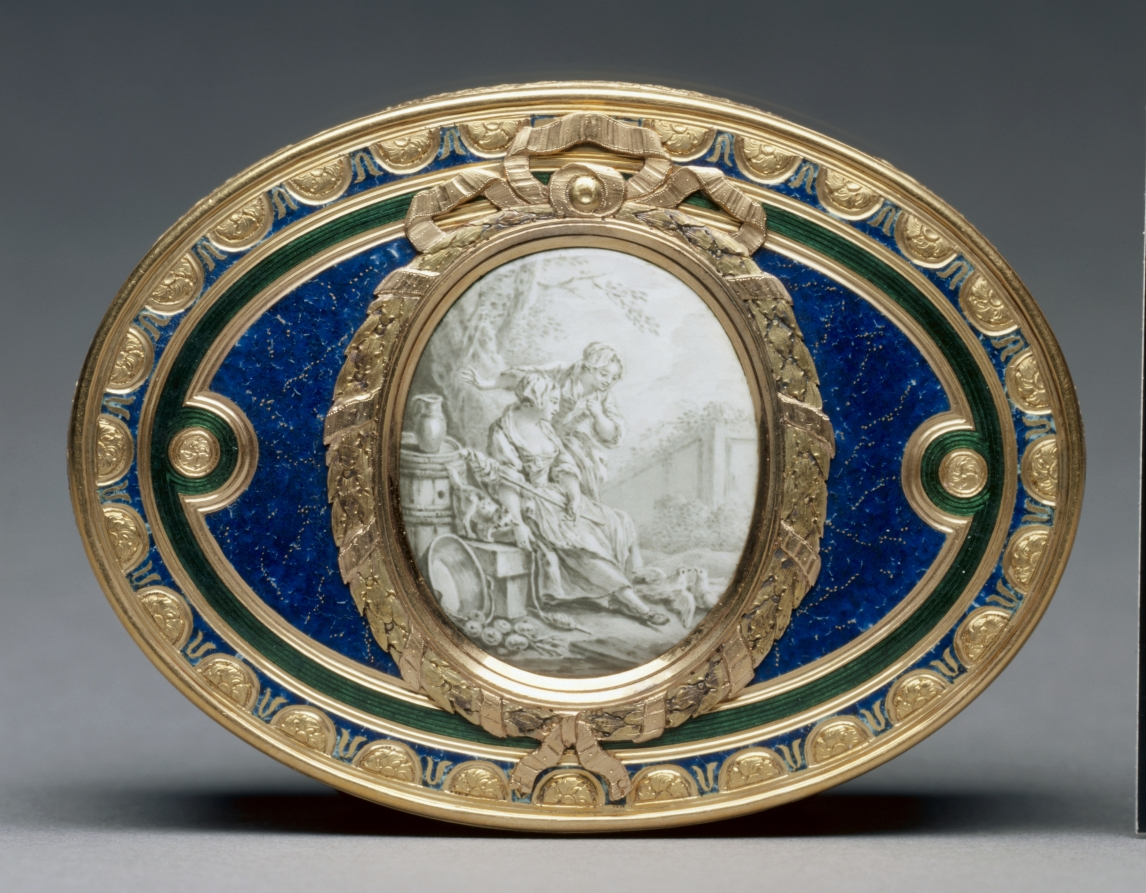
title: Snuff Box (Tabatière) with Portrait of Marie Antoinette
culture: France, 18th century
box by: Pierre-François-Mathis de Beaulieu (French)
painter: François Dumont (French, 1751–1831)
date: 1768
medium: watercolor on ivory in a gold and enamel box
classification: Enamel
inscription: [Maker's mark of Pierre-François-Mathis de Beaulieu, master goldsmith in 1768, inside cover]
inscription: [Charge mark of Jean-Jacques Prévot, 1762-1768, inside cover]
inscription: [Warden's mark of Paris, 1768-1769, inside cover]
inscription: [Discharge mark of Julien Alaterre, Paris, 1768-1774, on neck at right]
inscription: [Inside box, the letter]: "F"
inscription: [On bezel at left, engraved number]: "627"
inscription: [On front of bezel, engraved signature]: "Ve Georges Beaulieu à Paris"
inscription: [On right of miniature portrait, the letter]: "D"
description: This box was created through the collaboration of two skilled and well-known artisans of the period, master goldsmith Pierre-François-Mathis de Beaulieu and celebrated miniature painter François Dumont. The portrait of Marie Antoinette on the box's lid is painted in Dumont’s own style while those on the sides and bottom of the box take inspiration from the work of painter François Boucher, known for his pastoral scenes in the Rococo style.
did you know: Marie Antoinette, queen consort of French King Louis XVI and great patron of the decorative arts, was executed in 1793 at the end of the French Revolution.